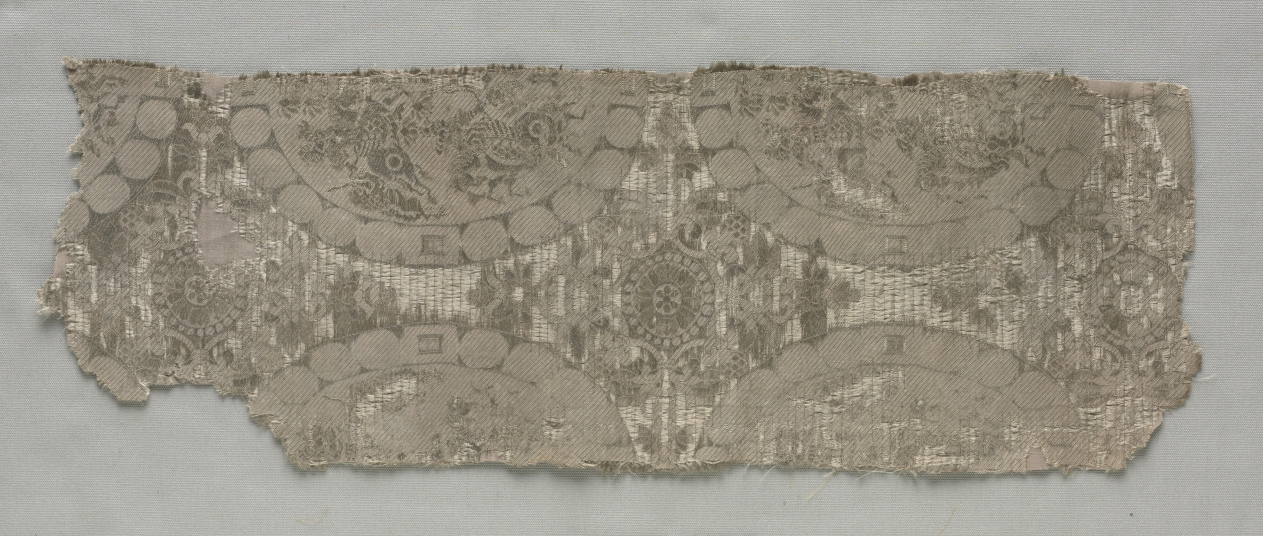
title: Fragment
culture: China, Qing dynasty (1644-1911)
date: c. 1800–1911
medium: Silk: lampas weave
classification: Textile